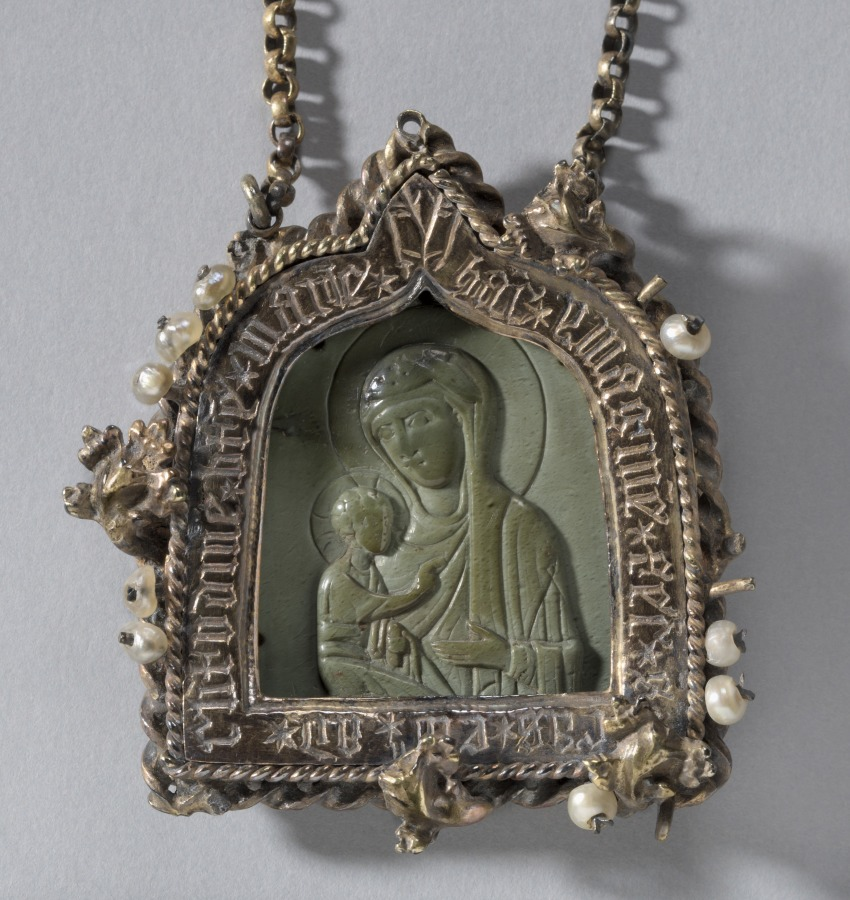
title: Pendant Icon with the Virgin "Dexiokratousa" and Frame with Winged Bull of Saint Luke on the back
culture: Byzantium (pendant); Germany, Aachen (frame), Byzantine period, 12th century (pendant); Byzantine period, 14th century (frame)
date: pendant 1100s; frame mid-1300s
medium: steatite, gilt silver, pearls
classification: Glyptic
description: This small-scale Byzantine icon depicts a half-length figure of the Virgin holding the Christ child. When the icon was mounted in its present frame by a German artist in the 14th century, it was considered to be an authentic portrait painted by Saint Luke. This claim, made in an inscription on the frame, is further emphasized by the ox, Saint Luke’s symbol, engraved on the frame’s reverse.